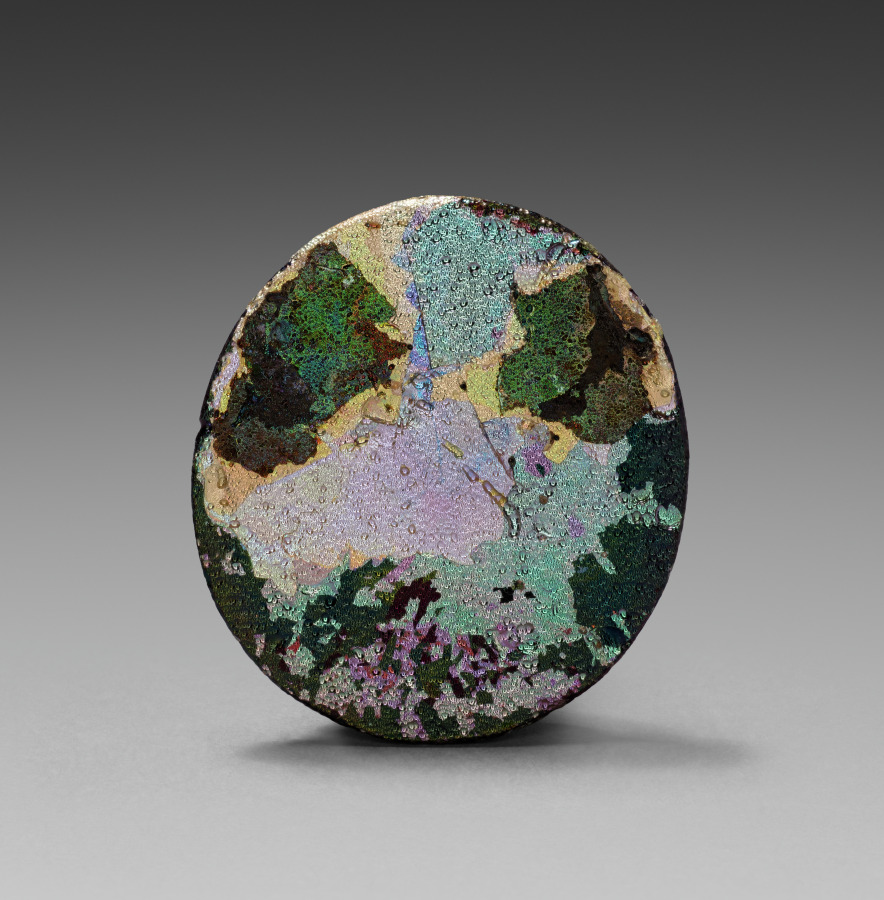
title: Cameo: Head of Diana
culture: Italy, Roman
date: 25 BCE - 100 CE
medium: glass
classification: Glass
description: This cameo depicts the Roman Goddess of the Hunt, Diana, known as Artemis to the Greeks. She faces left with her hair bound at the back of her head, her signature quiver of arrows visible over her shoulder. Roman cameo glass was made by fusing layers of different colored glass on top of one another, then carving down to reveal each different color. There are at least four layers of glass in this cameo: a dark layer for the hair, a whitish layer for the skin, middle tone for the background, and a dark purple for the base.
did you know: Ancient glass did not glitter; the iridescent film on this cameo developed over thousands of years.